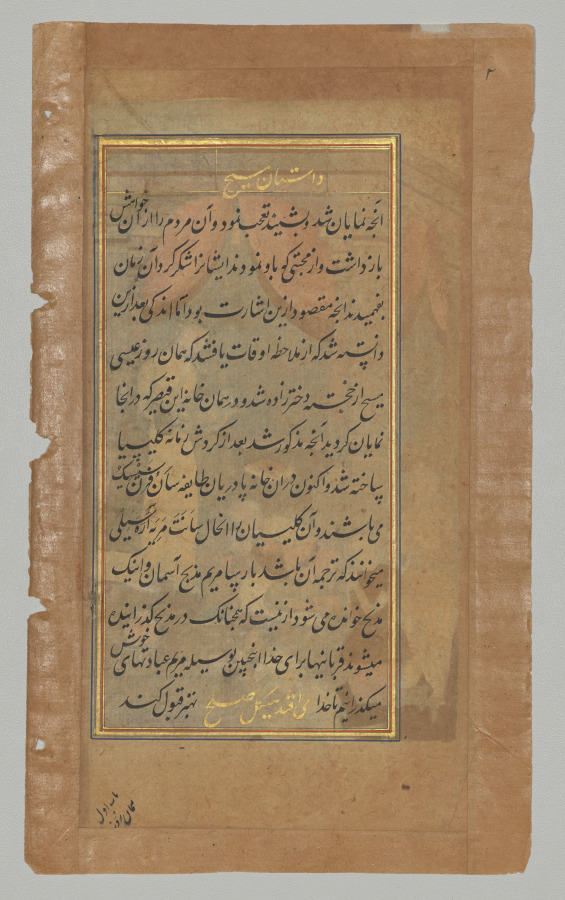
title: Text page from a Mirror of Holiness (Mir’at al-quds) of Father Jerome Xavier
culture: Mughal India, Allahabad, made for Prince Salim (1569–1627)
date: 1602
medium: Ink and gold on paper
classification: Manuscript